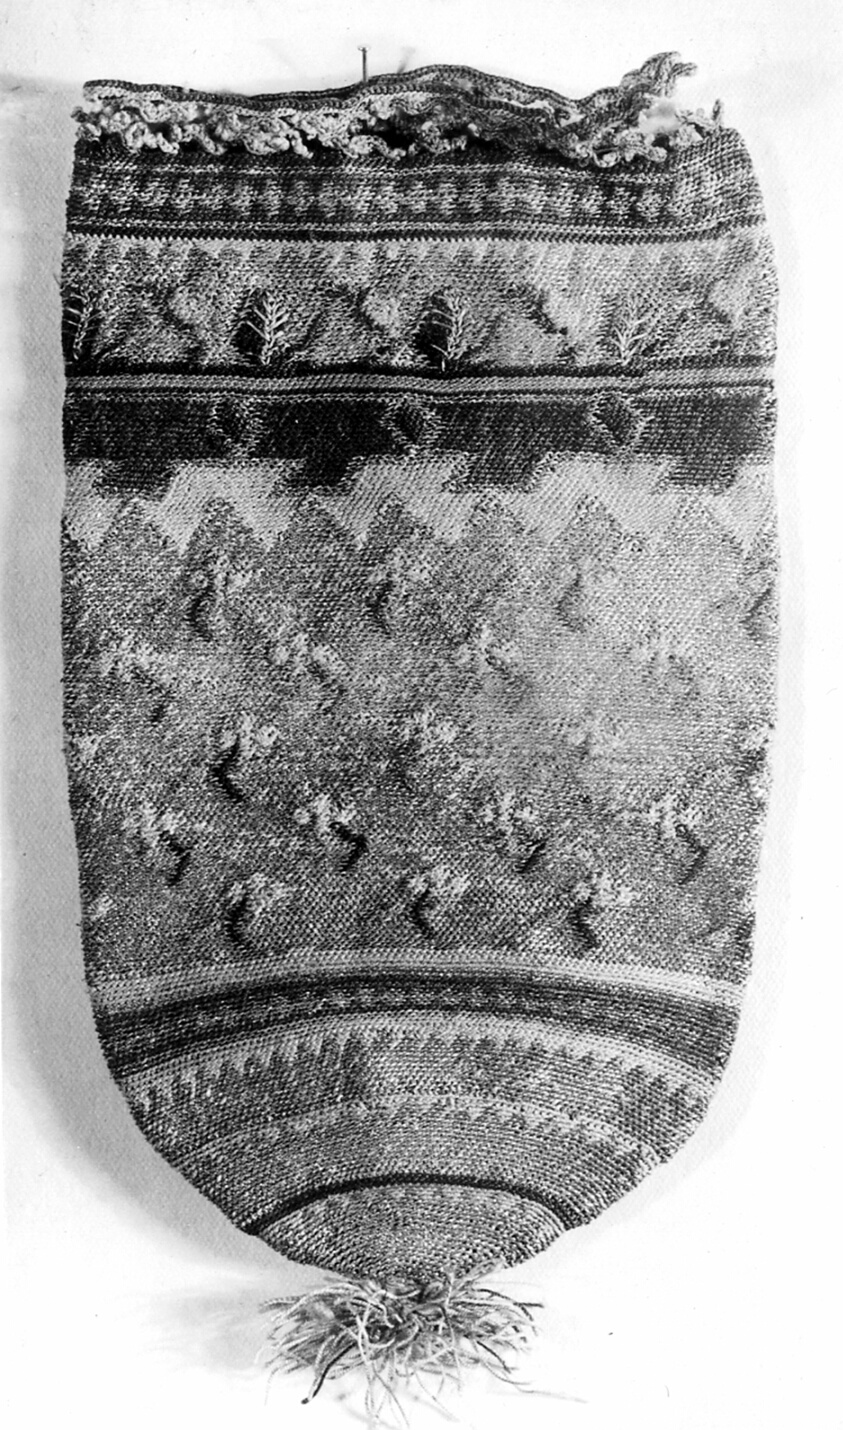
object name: Costume and Accessories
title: Bag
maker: Italy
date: 17th century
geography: Italy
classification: textile; costume accessory; costume accessory - bag; needlework (visual works); costume; dress (garment); clothing